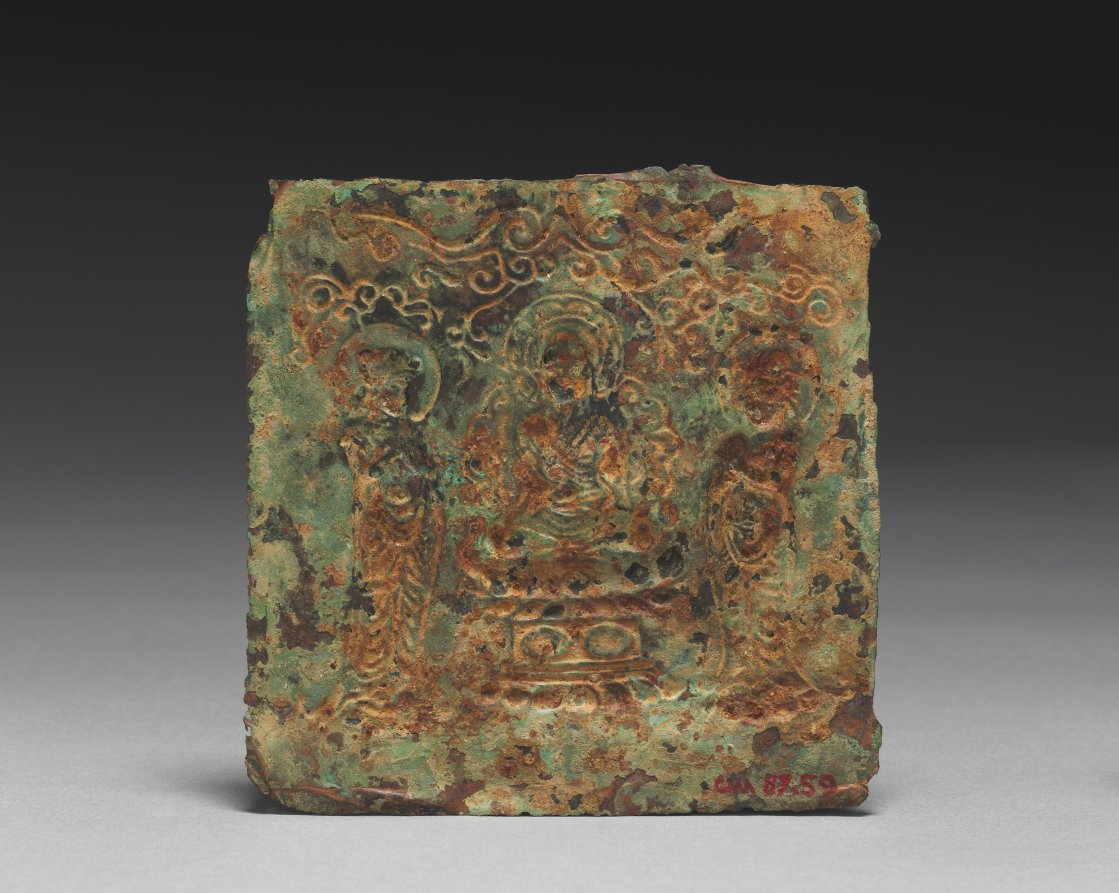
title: Plaque with the Image of Medicine Buddha Triad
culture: Korea, Unified Silla period (676-935)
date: 676–935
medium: embossed copper plate covered with gold leaf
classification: Metalwork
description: This plate features an embossed image of the Medicine Buddha flanked by two attendants. The Medicine Buddha, a doctor who cures aliments with Buddhist teachings, is usually represented holding a bowl of medicine in the palm of one hand.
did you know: The plate was created by hammering softly from the back of the metal sheet. This technique is called repoussé.